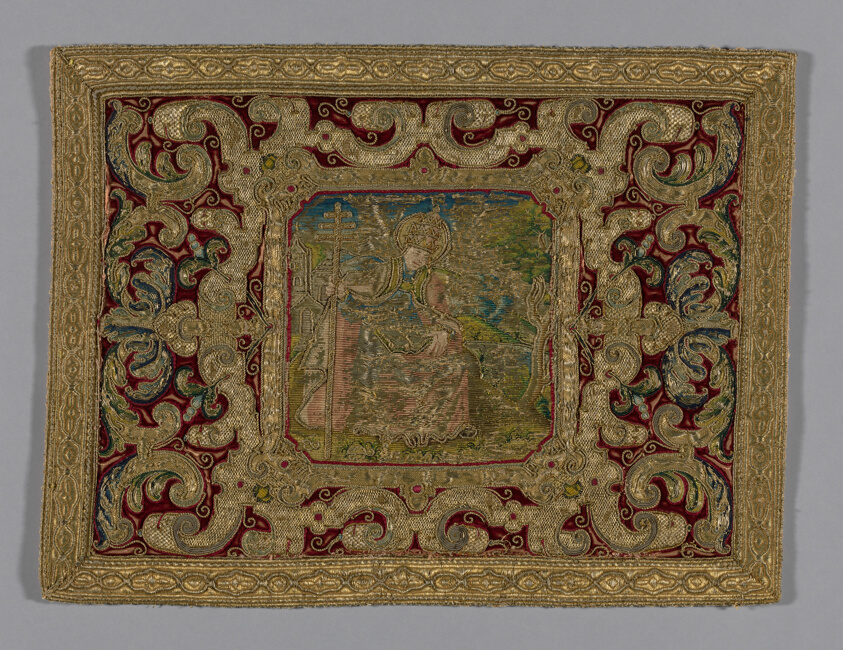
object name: Textile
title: Panel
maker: Italy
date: 16th century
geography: Italy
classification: textile; needlework (visual works); weaving - velvet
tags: man, church, trees, staffs